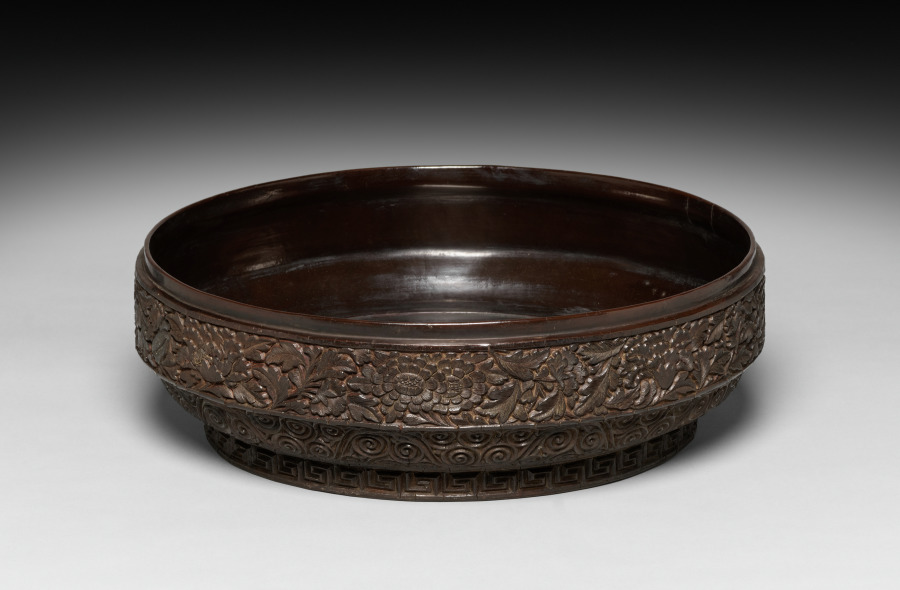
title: Round Box with Bird and Peonies Design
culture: China, late Southern Song (1127–1279) to early Yuan dynasty (1271–1368)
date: c. 1300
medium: carved lacquer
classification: Lacquer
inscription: 山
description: The carved lacquer box and lobed silver container nearby both feature pairs of birds and flowers on their covers. There is a striking similarity in decoration, shape, and aesthetic appeal. Both boxes suggest that successful designs and shapes circulated among craftsmen, workshops, and beyond regional borders.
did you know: To allow for the depth of carving, numerous layers of different colored lacquer were applied to a core of wood strengthened by a fabric covering impregnated with lacquer.